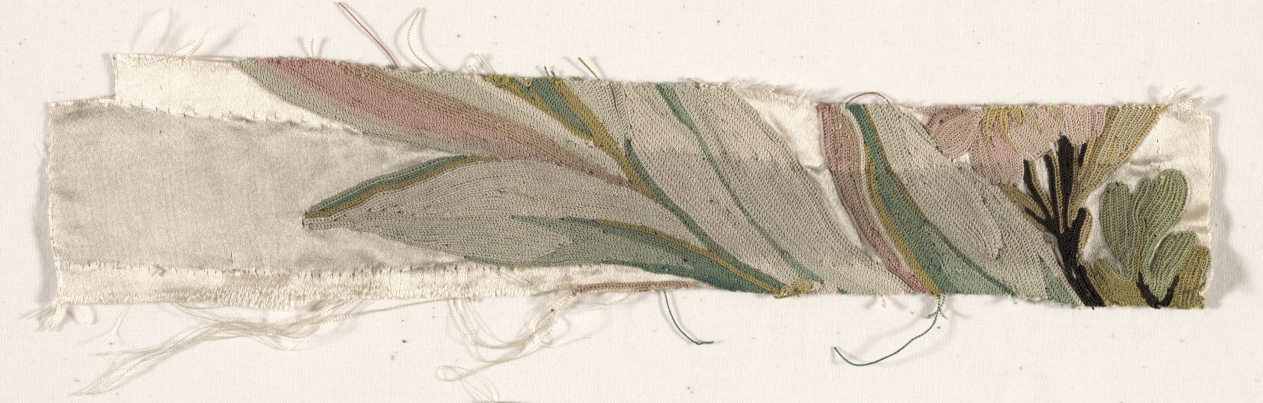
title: Coverlet Fragment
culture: France, 18th Century, period of Louis XVI (1774-1793)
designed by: Philippe de Lasalle (French, 1723–1805)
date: c. 1760–1770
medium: embroidered satin and silk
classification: Textile